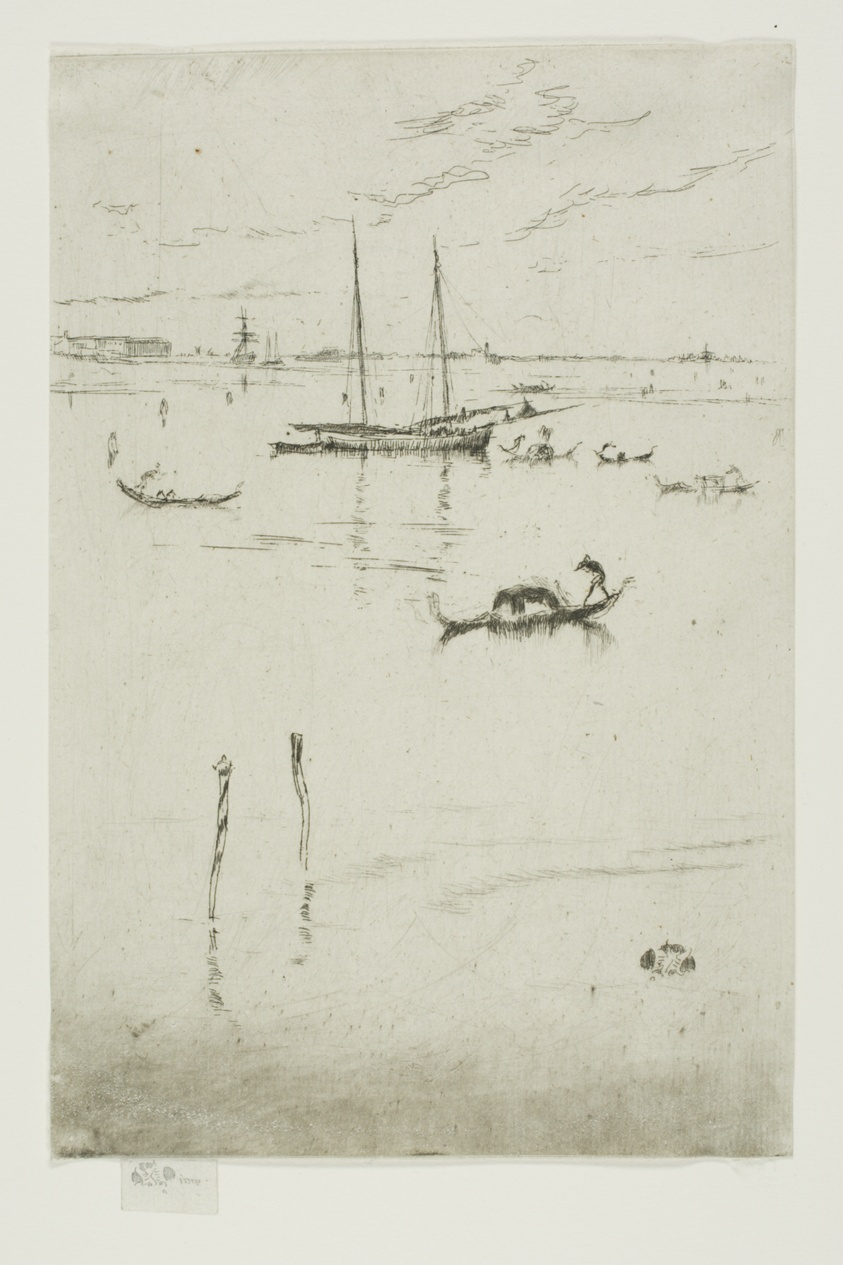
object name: Print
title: The Little Lagoon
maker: James McNeill Whistler (American, 1834-1903)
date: 1879/80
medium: Etching and drypoint with foul biting in black ink on ivory laid paper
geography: United States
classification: etching; foul biting; print; prints and drawing; drypoint; paper